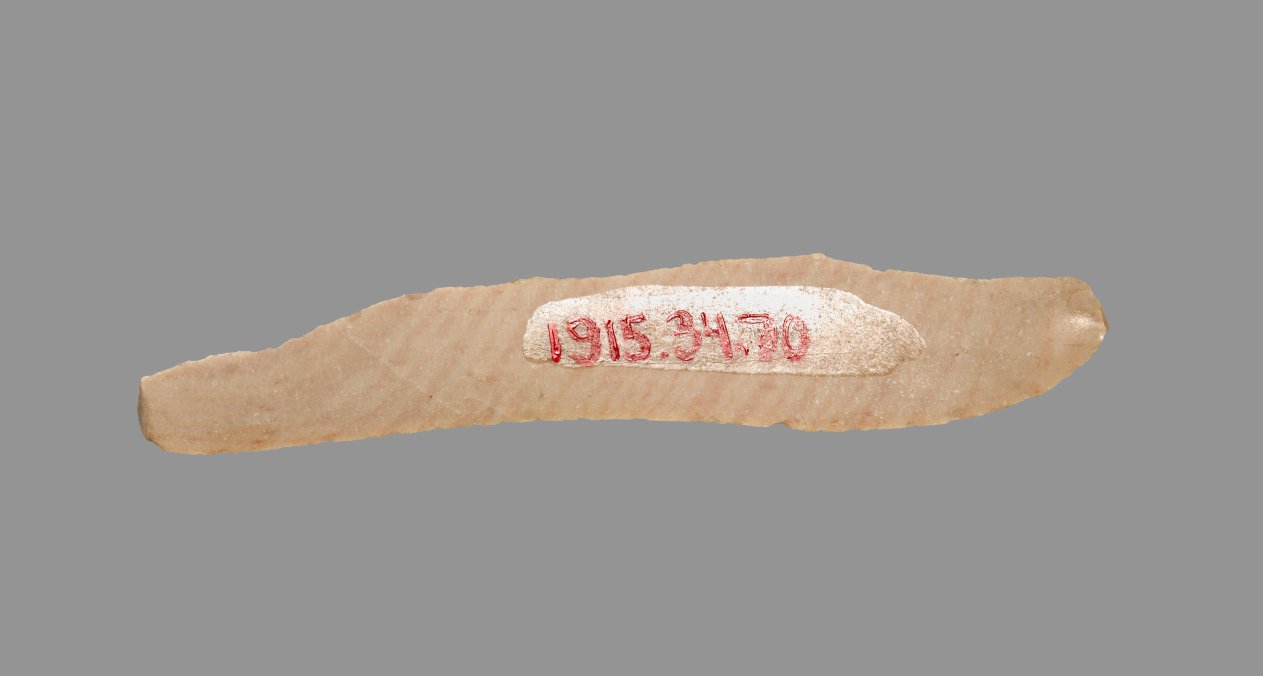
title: Sickle Blade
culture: Egypt, Middle Kingdom (2040–1648 BCE), Dynasty 12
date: 1980–1801 BCE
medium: flint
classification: Implements